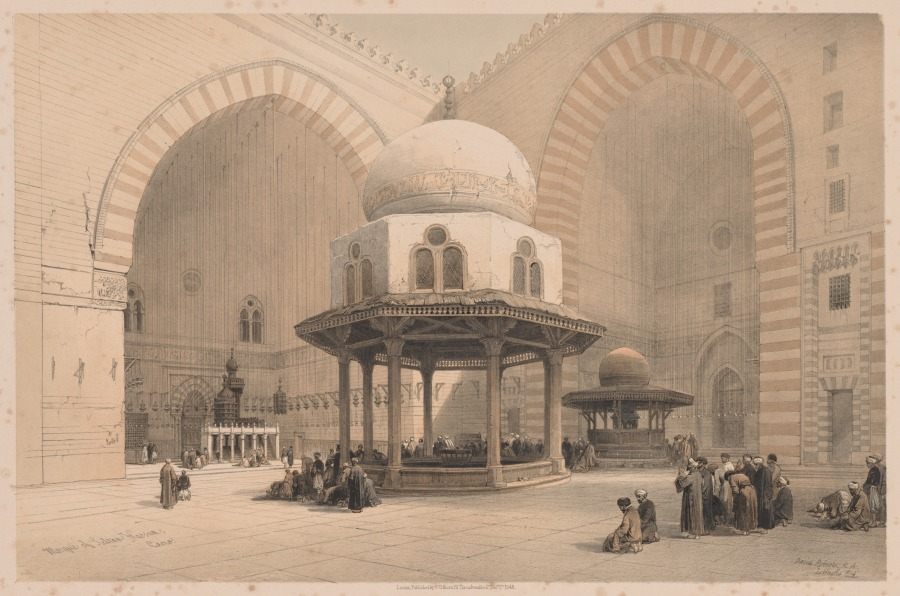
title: Egypt & Nubia, Volume III, No. 8: Mosque of Sultan Hassan, Cairo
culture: England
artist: Louis Haghe (British, 1806–1885)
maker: after David Roberts (Scottish, 1796–1864)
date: 1842–49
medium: color lithograph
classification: Print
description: The mosque and madrasa, school, of Sultan Hassan was built between 1356 and 1363 during the Mamluk period (1250–1517) in Egypt. The prestige of the project attracted craftspeople from across the Islamic world, which likely contributed to its innovative design. It is possible that stone from the Great Pyramid of Giza was used in its construction. This print features the central courtyard (sahn) with ablutions fountain (for washing one’s hands, feet, and face before prayer) and two of four monumental iwans, three-walled, vaulted rectangular halls. The interior walls and floor are covered in lavish stone and marble mosaics.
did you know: The minbar, a staircase-like pulpit from which a sermon is delivered by the prayer leader, imam, after Friday services, is visible in the hall on the left side of the print.